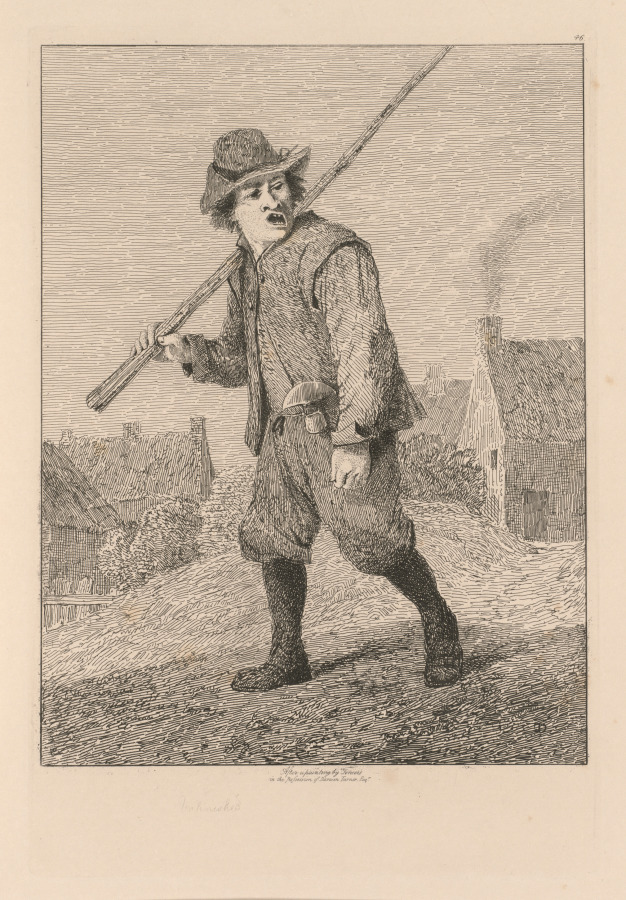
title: Liber Studiorum: Plate 46, Sketch after Teniers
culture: England, 19th century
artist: John Sell Cotman (British, 1782–1842)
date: 1838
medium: softground etching, from a bound volume containing 48 plates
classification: Bound Volume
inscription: In plate, above borderline, upper right: 46; in plate, within image: D; in plate, below image: After a painting by Teniers / in the possession of Darwen Turner, Esqr / Unfinished